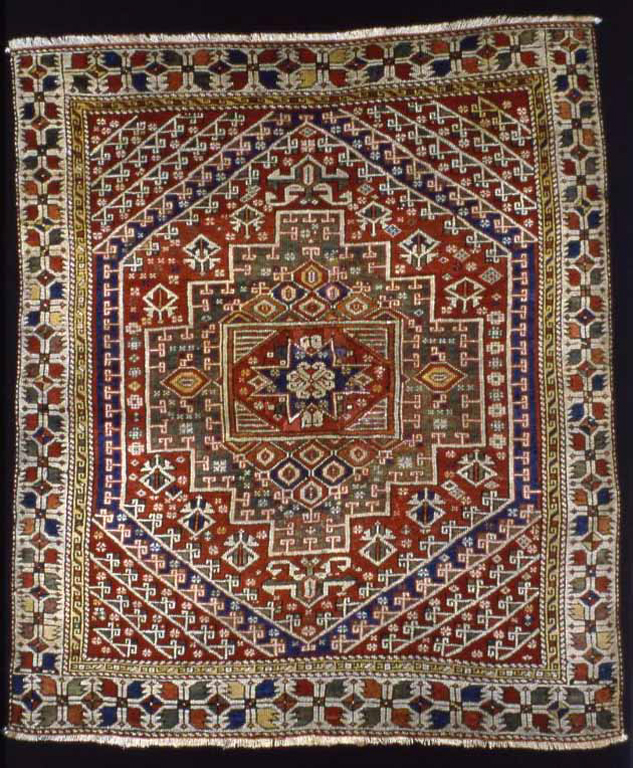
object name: Textile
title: Carpet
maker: Turkey, Anatolia, West or Central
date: 1875/1900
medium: Wool, plain weave with supplementary wrapping wefts forming cut pile through a technique known as "Ghiordes knots"; warp fringe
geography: Turkey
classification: textile; weaving - carpet